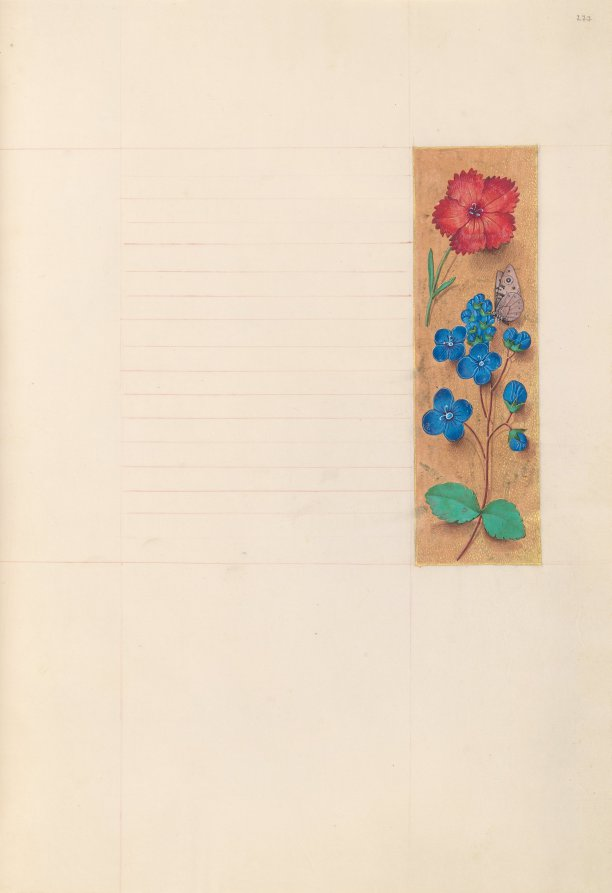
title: Hours of Queen Isabella the Catholic, Queen of Spain: Fol. 277r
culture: Flanders, Ghent and Bruges, late 15th century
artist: Master of the First Prayerbook of Maximillian (Flemish, c. 1444–1519)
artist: and Associates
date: c. 1500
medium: ink, tempera, and gold on vellum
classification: Bound Volume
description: This manuscript was illuminated by a circle of at least five highly organized manuscript painters active in the Flemish cities of Ghent and Bruges. The principal illuminator was Alexander Bening, who painted the majority of the book's miniatures. Manuscripts produced by this circle of artists are renowned for the decoration of their borders, which typically feature a rich variety of realistically-painted flowers, birds, and butterflies. This prayer book, called a book of hours, was intended not for a cleric, but for the private devotions of a lay person-in this case, Isabella the Catholic, Queen of Spain (1451-1504). Isabella's coat of arms embellishes the book's frontispiece. It is unlikely that the book was commissioned by the Queen herself; rather, she probably received it as a diplomatic gift from someone courting her patronage, perhaps Cardinal Francisco Jimenez de Cisneros. A Franciscan friar, Jimenez was dependent upon Isabella for his advancement, first to the post of Queen's confessor in 1492, and then to Archbishop of Toledo in 1495.